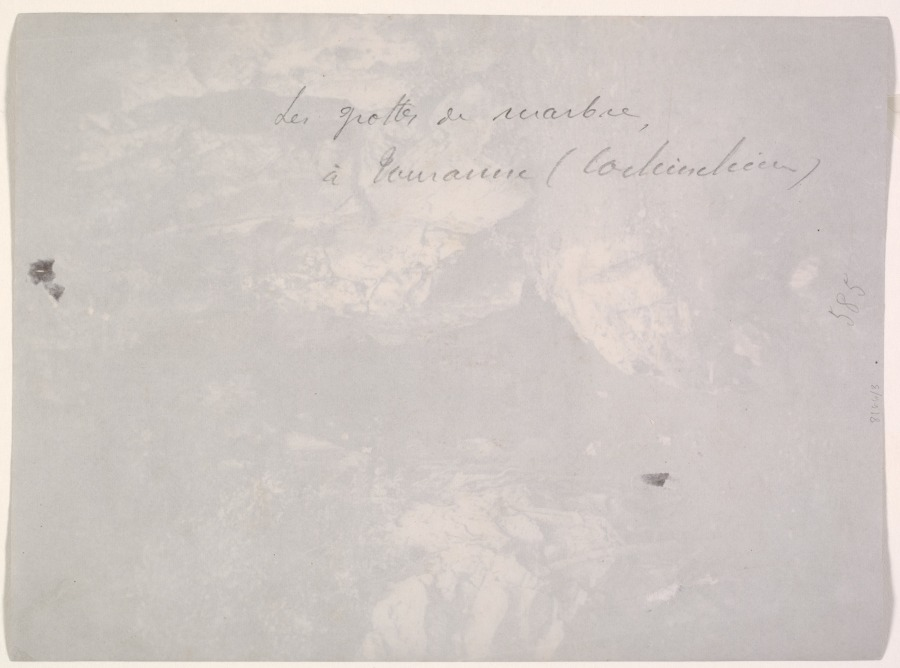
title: Hoa Nghiem Cave, Grotto of the August Transformation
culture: France, 19th century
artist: Émile Gsell (French, 1838–1879)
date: c. 1875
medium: Albumen print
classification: Photograph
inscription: Written in pencil on verso: "Les grottes de marbre/a Euuranne (loileinclieen) [indecipherable handwriting]" Written in pencil on verso: "585" Written in pencil on verso of mat: "Cambodia, Gsell c. 1876"